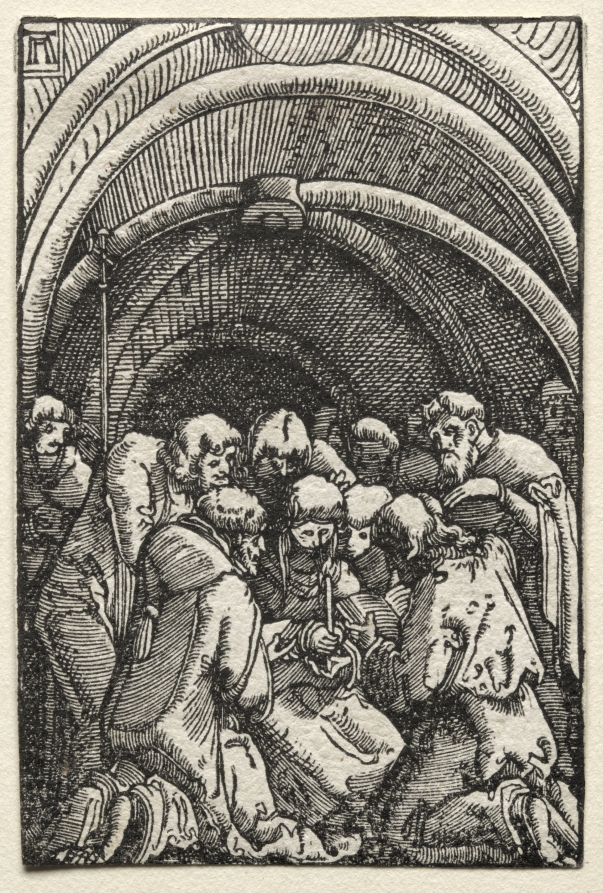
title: The Fall and Redemption of Man: The Death of the Virgin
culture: Germany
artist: Albrecht Altdorfer (German, c. 1480–1538)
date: c. 1515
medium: woodcut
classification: Print